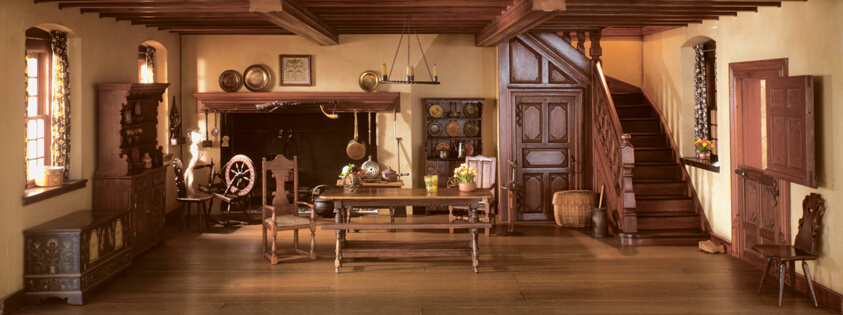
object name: Miniature room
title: A17: Pennsylvania Kitchen, 1752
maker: Designed by Narcissa Niblack Thorne; American, 1882-1966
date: c. 1940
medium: Miniature room, mixed media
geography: United States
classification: miniature; thorne rooms